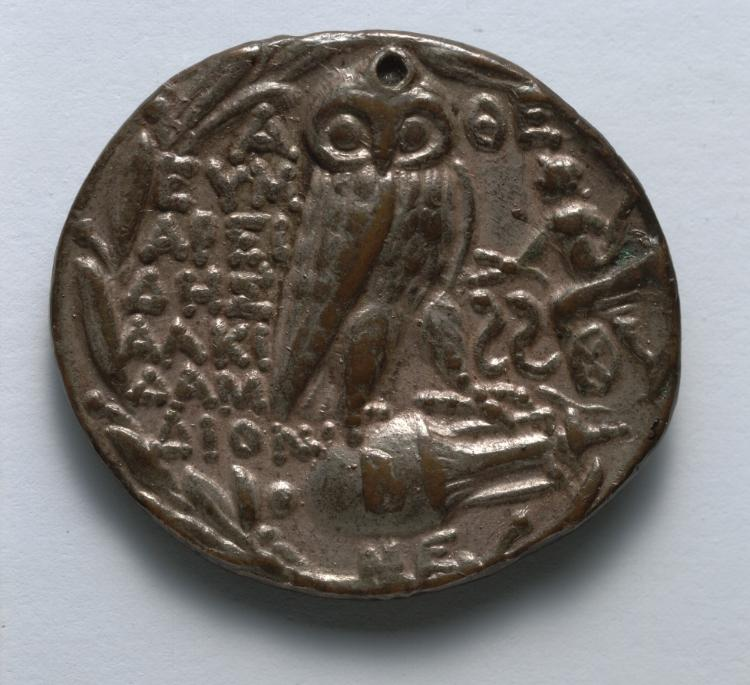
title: Electrotype Replica of Tetradrachm: Owl, Panathenaic Amphora, Triptolemos in Chariot, within Wreath (reverse)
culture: Greece (?)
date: 1838–1916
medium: Silver-plated copper alloy (?)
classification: Coins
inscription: EYM/APEI/ΔΗΣ/ΑΛΚΙ/ΔΑΜ/ΔΙΟΝ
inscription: ΜΕ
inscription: ΑΘΕ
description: With a green tint betraying its copper content, this coin is an electrotype replica created more than a century ago. It precisely replicates the form of a 2nd-century BC original. Retaining the basic scheme of Athena and owl from earlier Athenian coinage, these “New Style” tetradrachms—as scholars call them—give the goddess a more naturalistic appearance and add an amphora, olive wreath, and magistrate names to the reverse.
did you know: This silver-plated replica weighs about 12 grams, nearly 30% less than a pure silver tetradrachm.